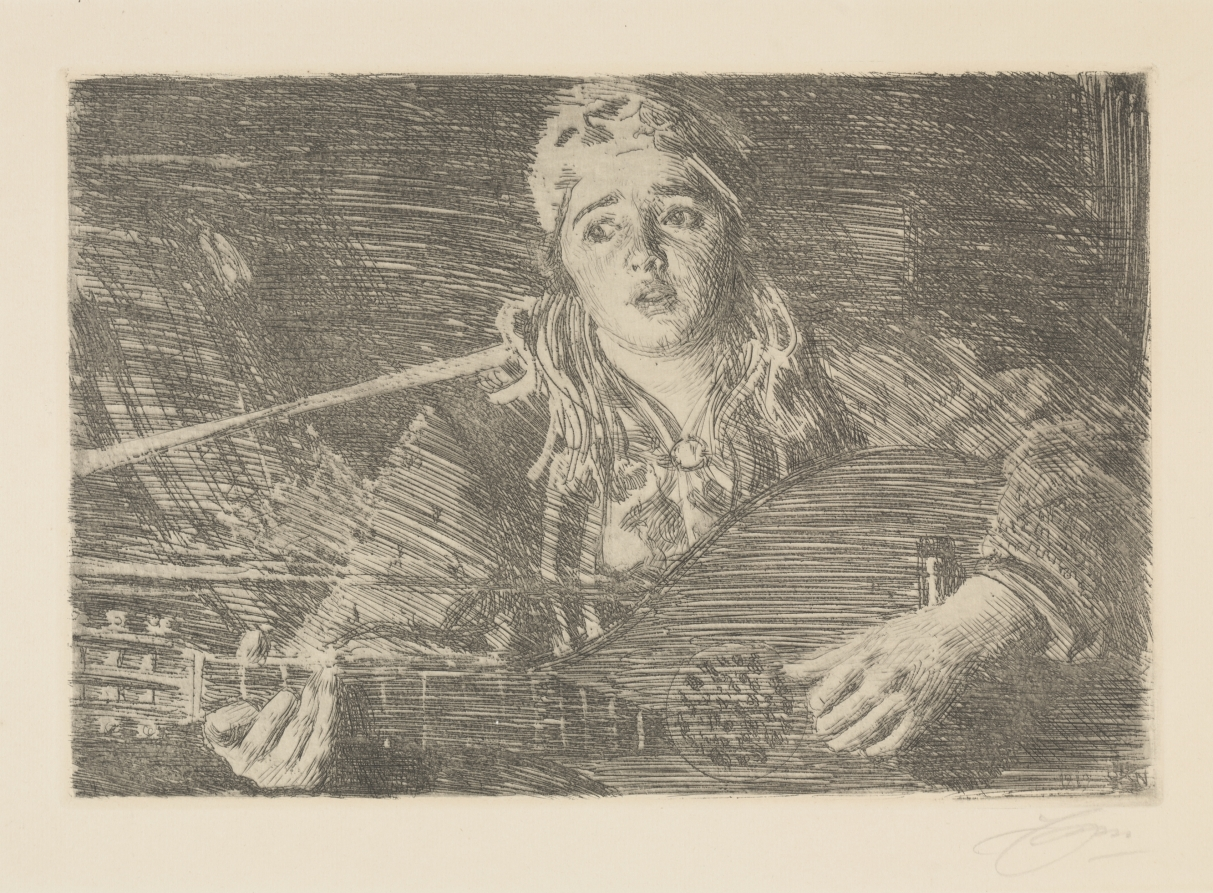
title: Ols Maria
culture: Sweden, 20th century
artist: Anders Zorn (Swedish, 1860–1920)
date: 1919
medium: etching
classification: Print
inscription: Lower right margin, in pencil: A Zorn